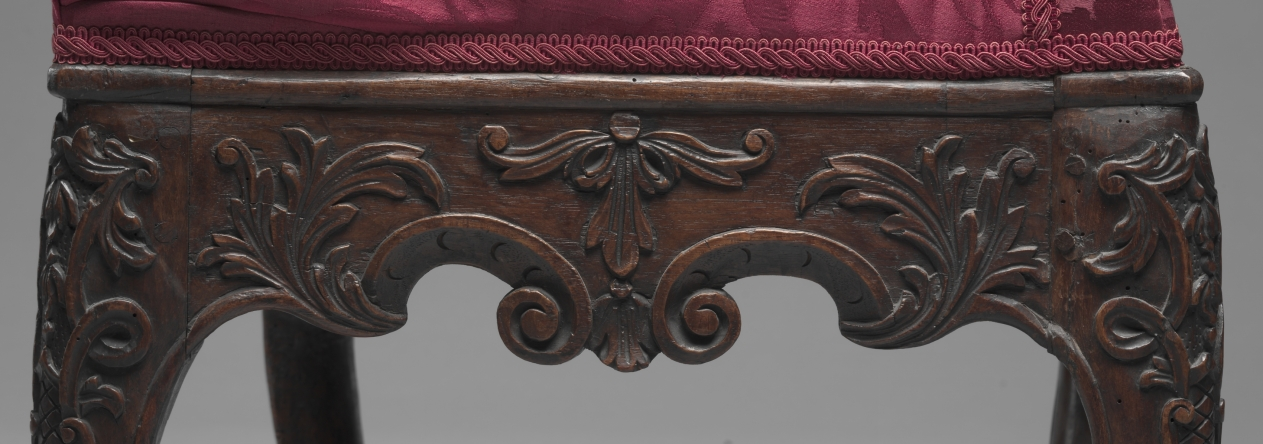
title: Side Chair (1 of 2)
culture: Germany, Belgium, or the Netherlands, early 18th century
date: early 1700s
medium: walnut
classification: Furniture and woodwork